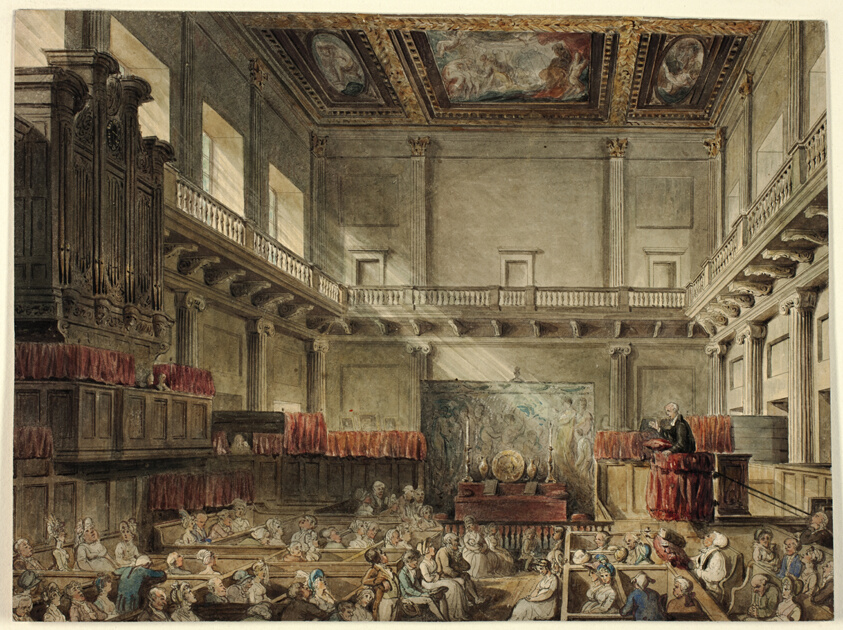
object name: Drawing and Watercolor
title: Study for Royal Chapel, Whitehall, in Micocosm of London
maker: Augustus Charles Pugin (English, born France, 1762-1832); Thomas Rowlandson (English, 1756-1827)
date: 1807–10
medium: Pen and ink and watercolor on paper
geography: England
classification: watercolor; pen and ink drawings; drawings (visual works); prints and drawing